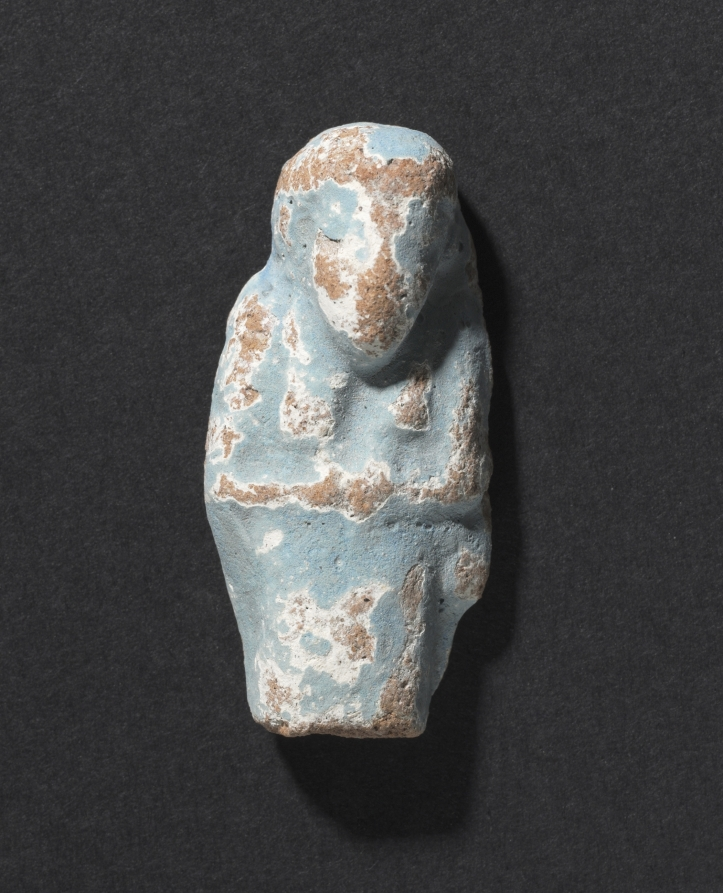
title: Shawabty of Ditamenpaankh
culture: Egypt, Late period (715–332 BCE), Dynasty 25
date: 715–656 BCE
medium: terracotta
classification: Funerary Equipment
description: High demand for shawabtys in the Late Period, a time when as many as 400 or more shawabtys were placed in the tomb with the deceased, gave rise to a specialized container for storing them: the shawabty box. This example is inscribed for the lady of the house, Ditamenpaankh, and was probably one of a pair originally made for her. The single-masted boat on the box's lid is perhaps an allusion to the pilgrimage of the deceased to the holy city of Abydos, the cult city of Osiris, king of the dead. The shawabtys inside are crude, mass-produced examples cast in an open mold. Made of terracotta, their blue paint imitates more costly shawabtys made of faience. As for the shawabty spell, it has been removed from its traditional location on the shawabty's front and relocated onto the sides of box, where it needed only to be written once, thus expediting production.